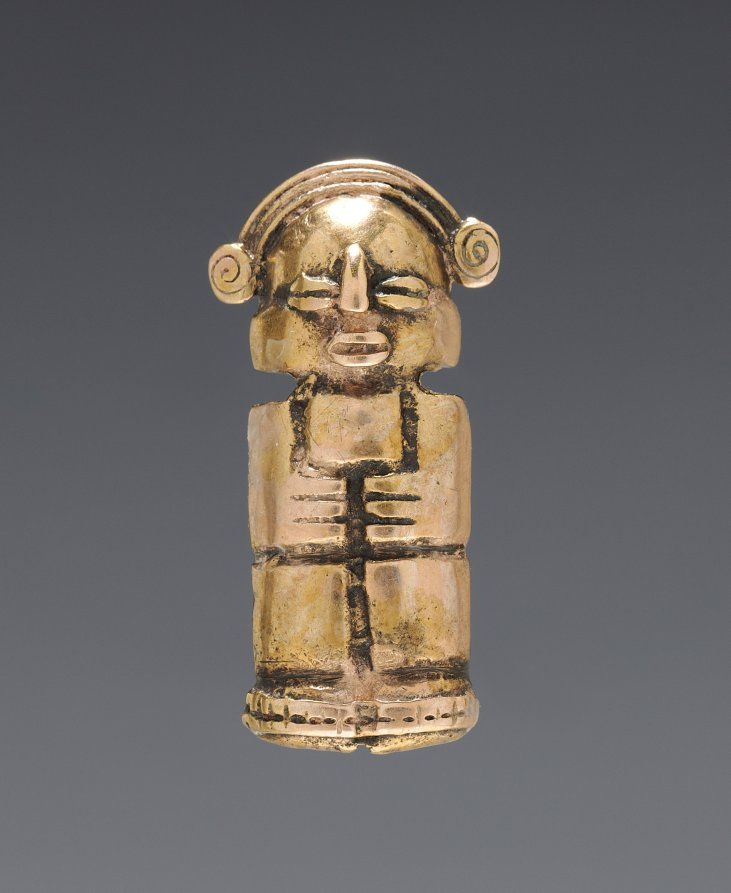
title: Necklace Figurine Bead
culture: Colombia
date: 1–700 CE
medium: cast gold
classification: Jewelry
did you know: Working with gold dates back to at least 500 BC in Ecuador and Colombia.